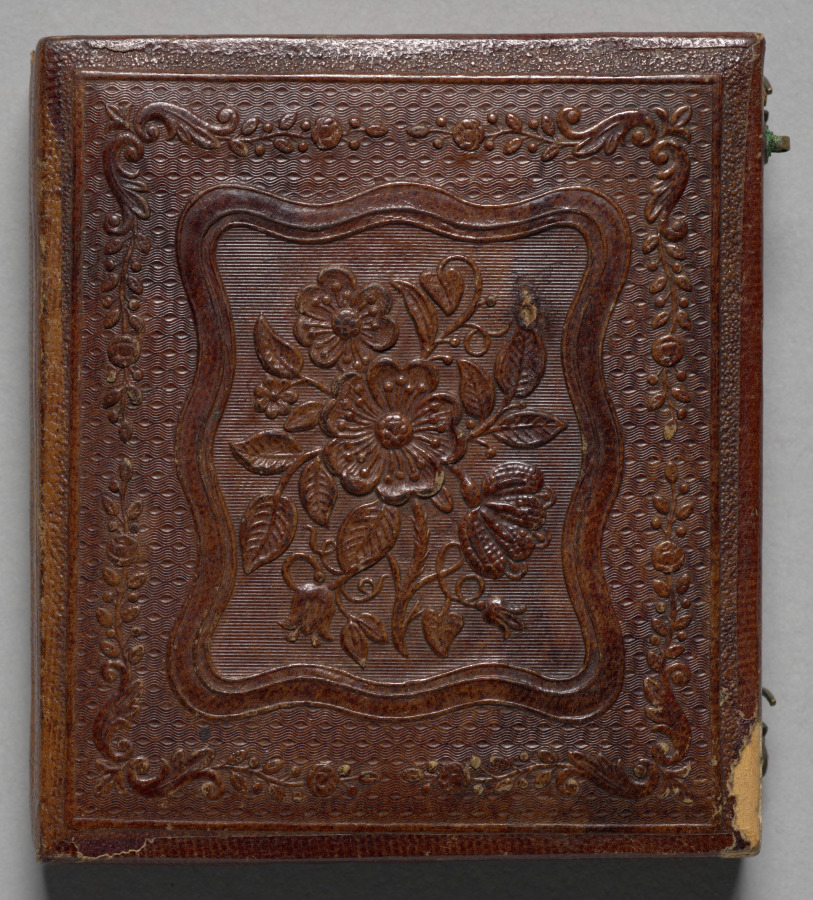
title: Crowd with sleigh in front of LL & ER Smith store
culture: America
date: c. 1858–65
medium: ambrotype, sixth plate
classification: Photograph